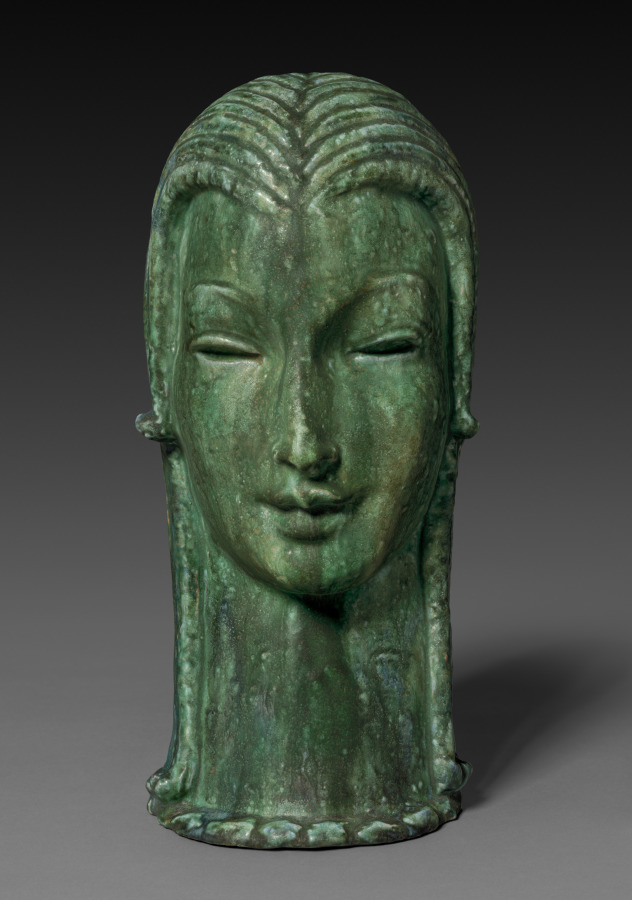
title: The Green Mask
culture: America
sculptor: Joseph C. Motto (American, 1892–1965)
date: 1929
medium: ceramic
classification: Ceramic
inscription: on right side: "Motto."